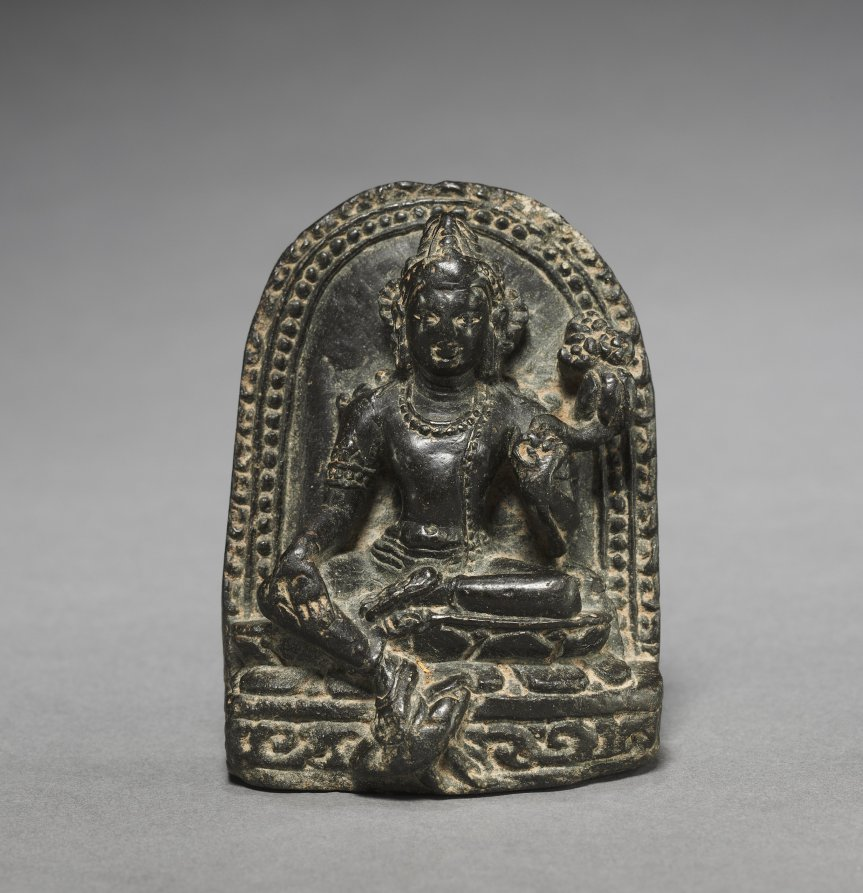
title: Stele with Padmapani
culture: India, Nalanda, Pala Period, 10th Century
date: 900s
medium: black chlorite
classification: Sculpture